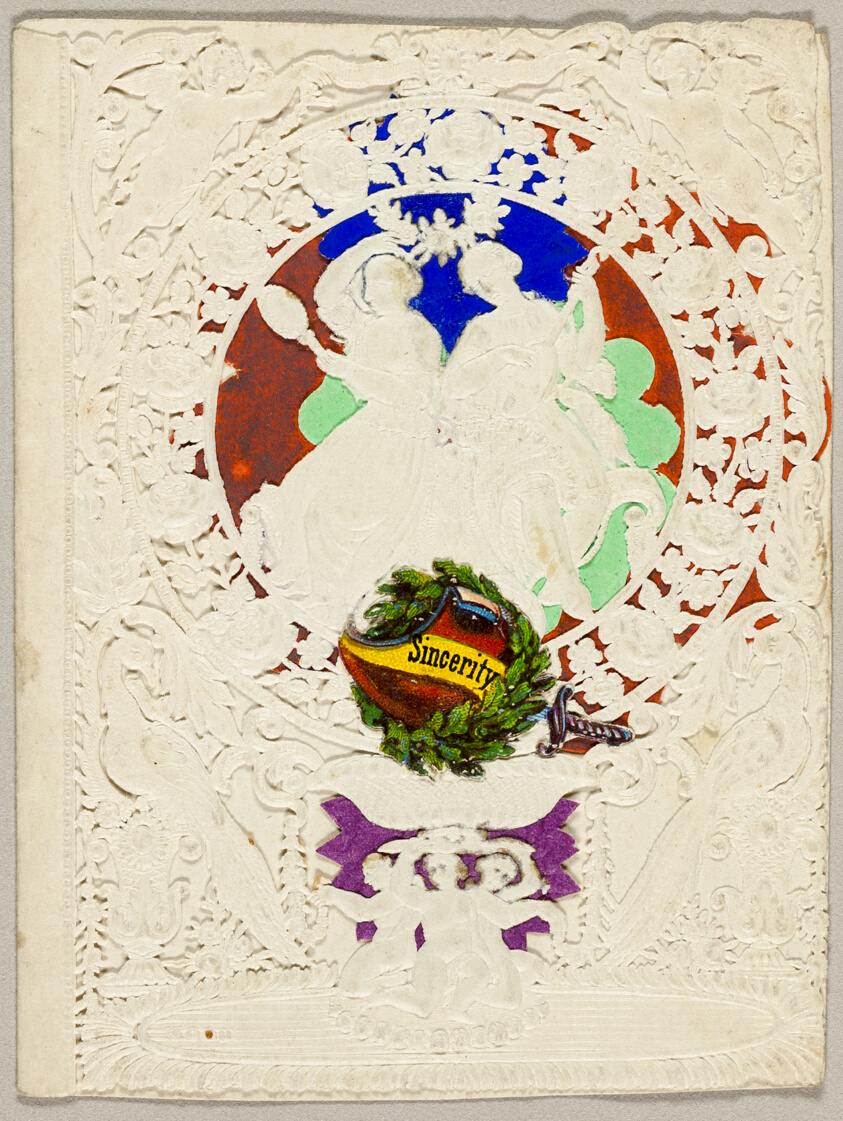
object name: Drawing and Watercolor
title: Sincerity (valentine)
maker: Thomas Wood (English, 19th century)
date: 1840/50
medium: Collaged elements on cut and embossed (designed) ivory wove paper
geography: England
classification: collage; valentine; prints and drawing; paper